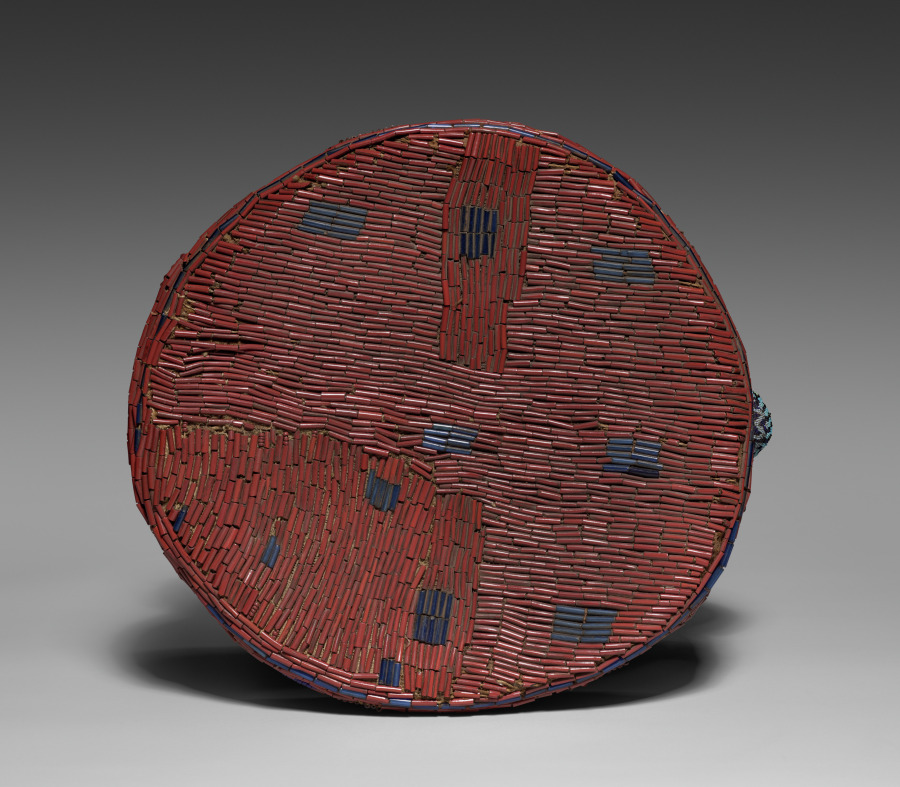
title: Prestige stool (Kuo fo)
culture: Africa, Central Africa, Cameroon, Bandjoun Kingdom, Bamileke makers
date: possibly 1800s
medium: Wood, cotton, plant fiber, glass beads, and indigo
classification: Furniture and woodwork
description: Bead-covered wooden stools and thrones are one of the most prevalent art forms among the various kingdoms and chiefdoms in the Cameroon Grassfields region. This example, once part of the royal treasury, belongs in the category of "travel stools," usually used in conjunction with more private, minor ceremonies and rituals at the palace. The leopard imagery confirms the object’s royal status. It alludes to the belief that the king could temporarily transform himself into this feared predator.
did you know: The beads on this stool were sewn on by hand. Look underneath the stool, however, and you can see commercially made printed fabric.